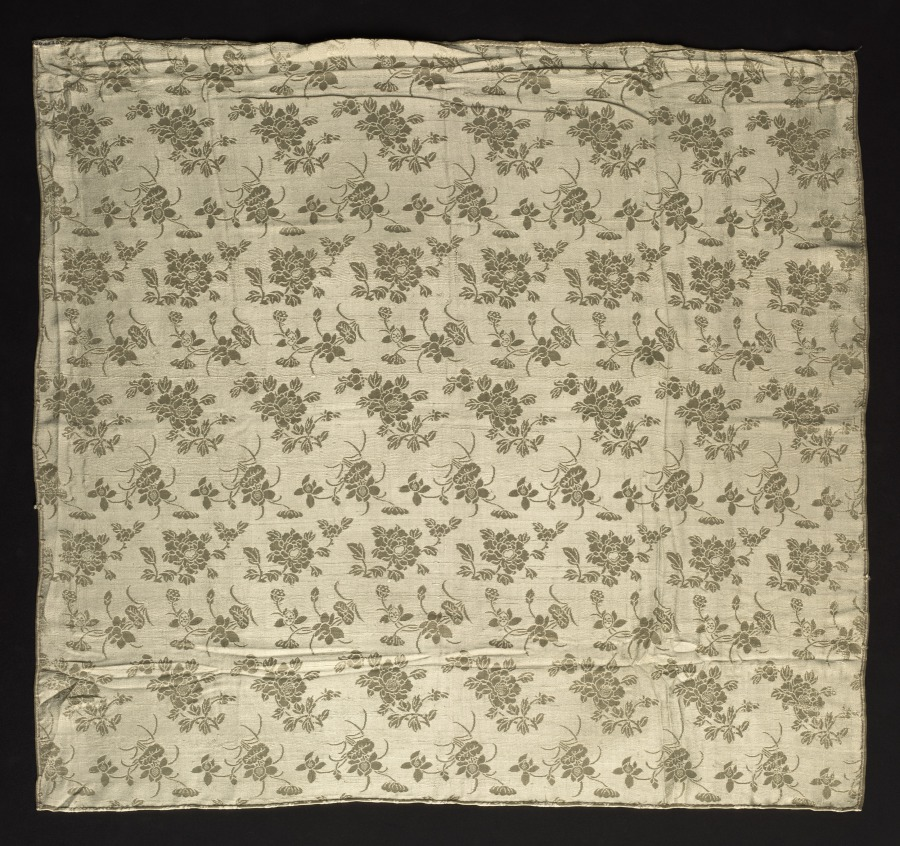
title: Fragment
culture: China, 19th century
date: 1800s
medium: silk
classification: Textile